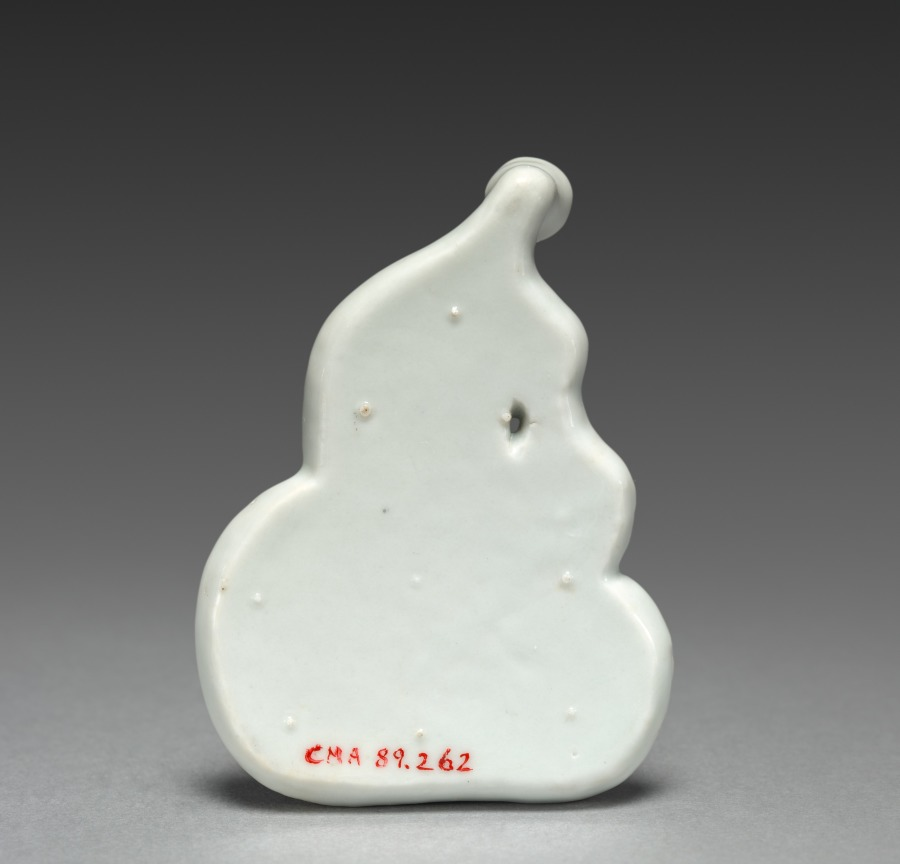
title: Ink Palette in the Shape of a Gourd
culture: Japan, Edo period (1615–1868)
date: 1700s to mid-1800s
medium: porcelain, molded and carved, with underglaze blue and overglaze green and gold enamels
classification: Ceramic